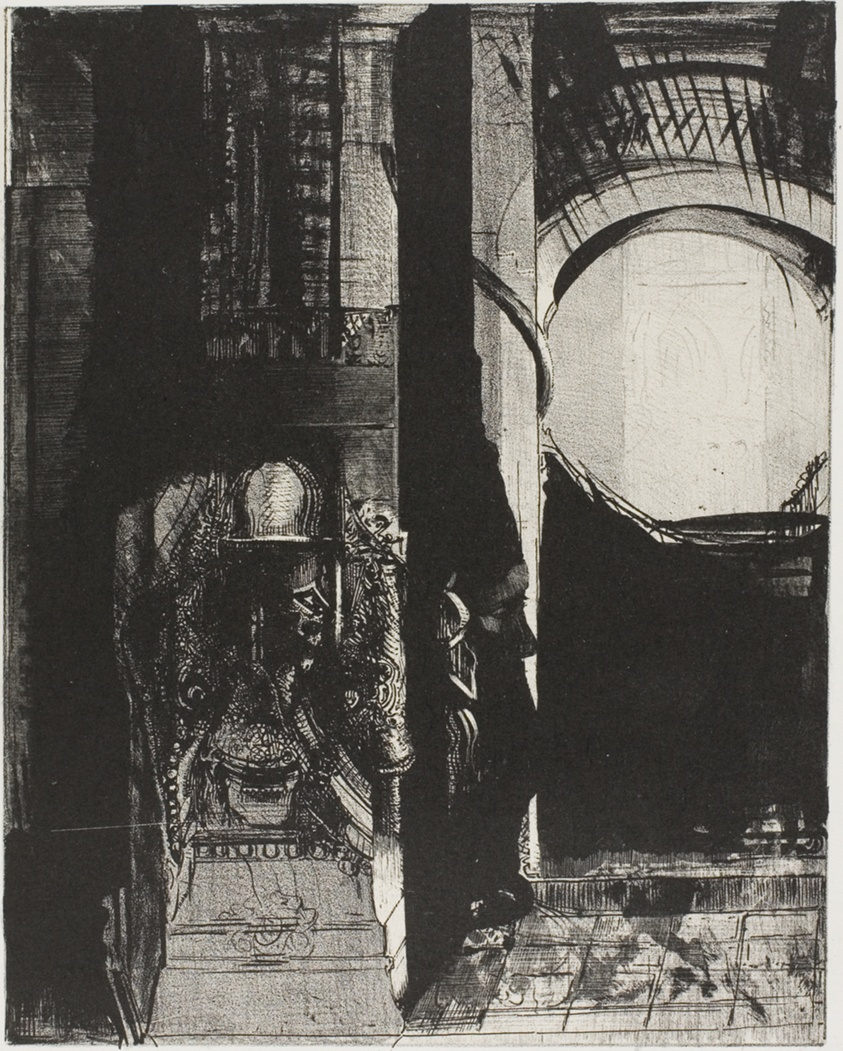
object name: Print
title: And On Every Side Are Columns of Basalt,...the Light Falls From the Vaulted Roof, plate 3 of 24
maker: Odilon Redon (French, 1840-1916)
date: 1896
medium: Lithograph in black on ivory China paper laid down on ivory wove paper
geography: France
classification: lithograph; print; prints and drawing; paper